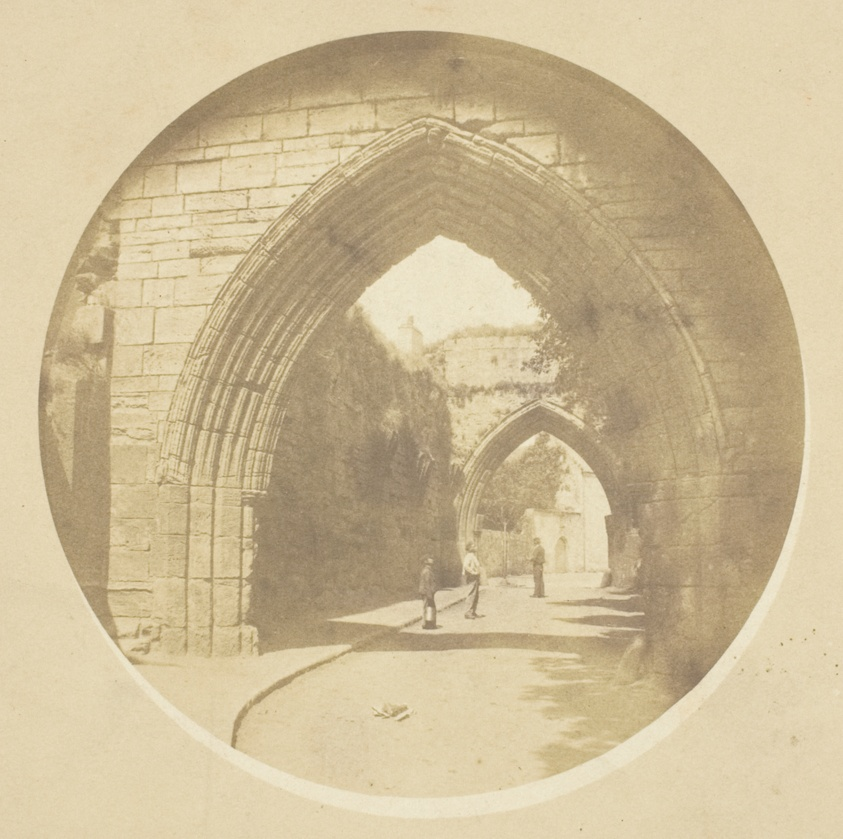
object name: Photograph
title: St. Andrews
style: 19th century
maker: David Octavius Hill (Scottish, 1802–1870)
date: c. 1850/70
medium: Salted paper print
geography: Scotland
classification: salted paper print; photographic process; photography; photograph